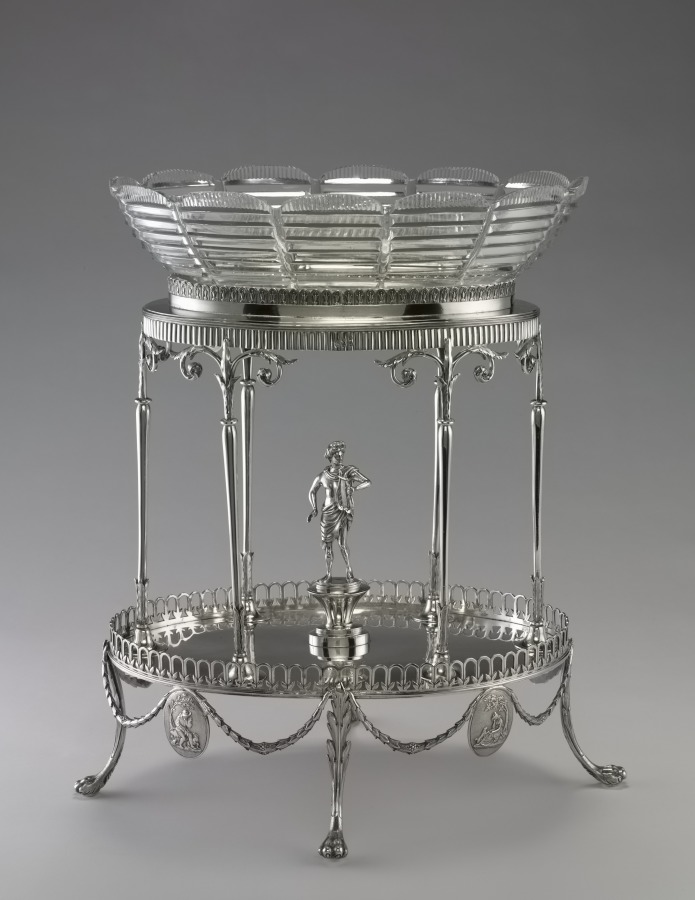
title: Centerpiece (metal stand and glass bowl)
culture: England, 18th century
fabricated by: William Pitts (British)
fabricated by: Joseph Preedy (British)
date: 1792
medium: silver and glass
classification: Silver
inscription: engraved: arms and crest of Bell Coat of arms with Bell impaling Brandling on flat platform.